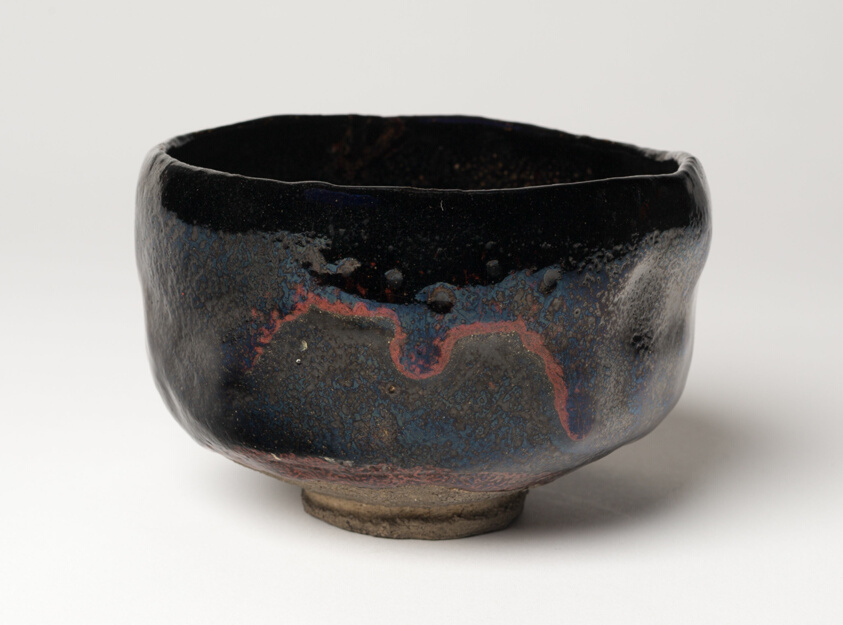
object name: Decorative Arts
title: Raku Ware Tea Bowl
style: Japanese (culture or style)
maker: Raku Ryōnyū (Japanese, 1756–1834)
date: 18th century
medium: Glazed stoneware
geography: Japan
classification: drinking vessel; porcelain; asian art; ceramics; vessel; decorative arts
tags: tea